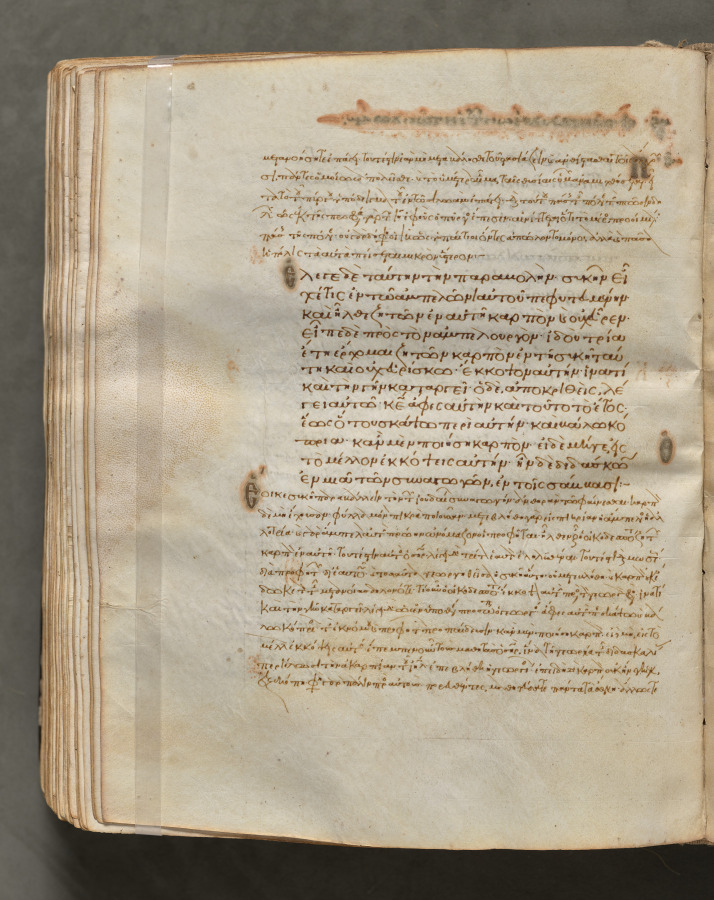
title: Text, folio 272 (verso), from a Gospel Book with Commentaries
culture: Byzantium, Constantinople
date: c. 1000–1100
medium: ink, tempera, and gold on vellum; leather binding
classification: Bound Volume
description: Each of the four gospels in this book opens on a page with brilliantly illuminated borders depicting the author of the text as well as birds—principally peacocks, symbols of the immortality of the soul—and fountains, representing the fountain of life and the salvation of the soul. This volume consists of 428 leaves with texts in Greek. Its level of sophistication suggests that it was probably written and decorated in a monastery in Constantinople.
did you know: Gospel books were carried in procession through Byzantine churches.